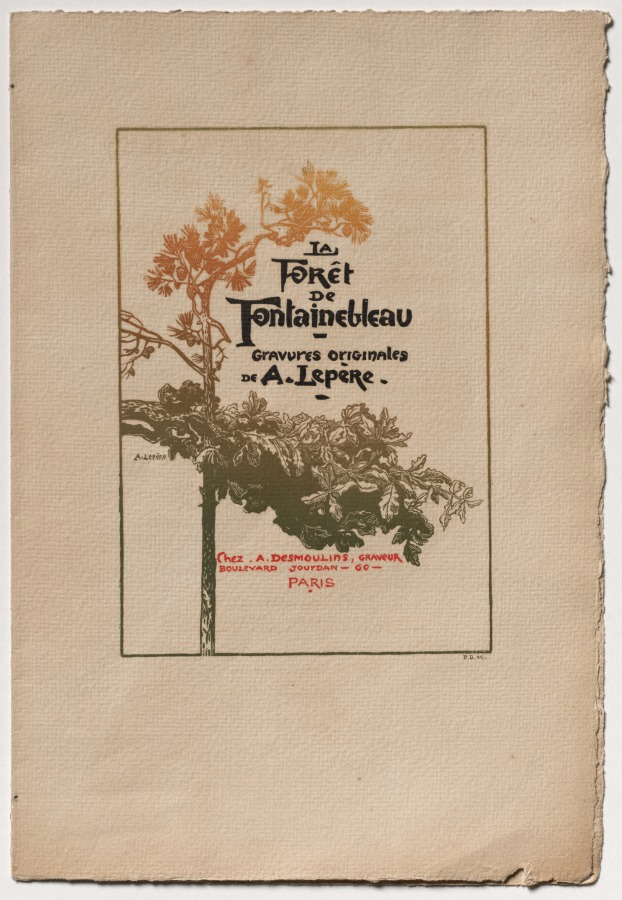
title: Fontainebleau Forest: Ad for "Fontainebleau Forest" (La Forêt de Fontainebleau)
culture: France, 19th century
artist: Auguste Louis Lepère (French, 1849–1918)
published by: A. Desmoulins, Published in Revue Illustrée, 1887–90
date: 1890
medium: pamphlet, color woodcut on cover, related to bound volume with 34 wood engravings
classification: Bound Volume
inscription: In block within image, in green ink, printing in letterpress: A. LEPÉRE; in plate, within image, in black ink: LA FORÊT DE FONTAINEBLEAU / Gravures originals de A. Lepère; in plate, within image, in red ink: Chez A. DESMOULINS, GRAVEUR / BOULEVARD JOURDAN - 60 -- / PARIS; below image, in green ink: P.D. SC.